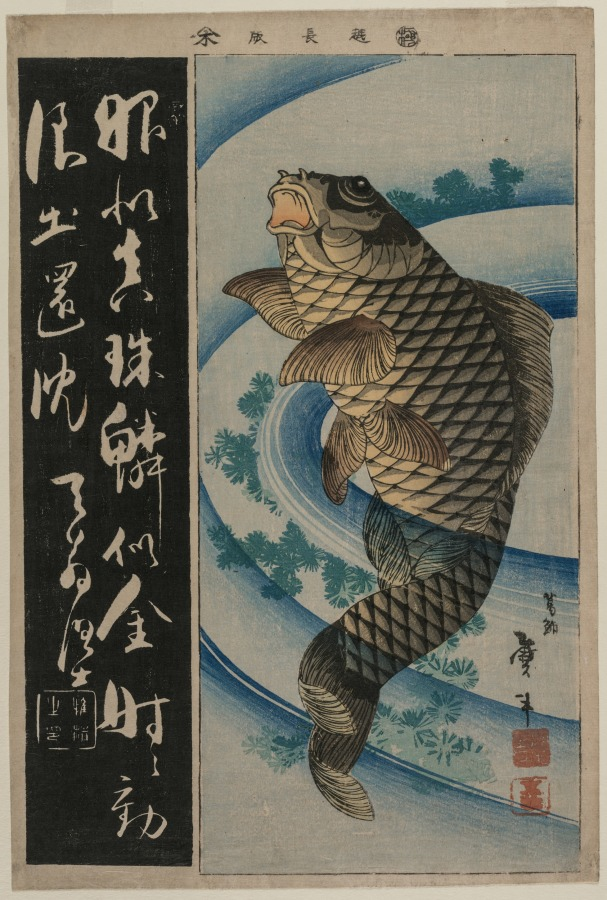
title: Carp and Waterweeds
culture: Japan, Edo period (1615–1868)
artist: Katsushika Taito II (Japanese, active c. 1810–50s)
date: c. early 1830s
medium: color woodblock print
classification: Print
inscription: Signature: Katsushika Taito Censorship Seal: kiwame